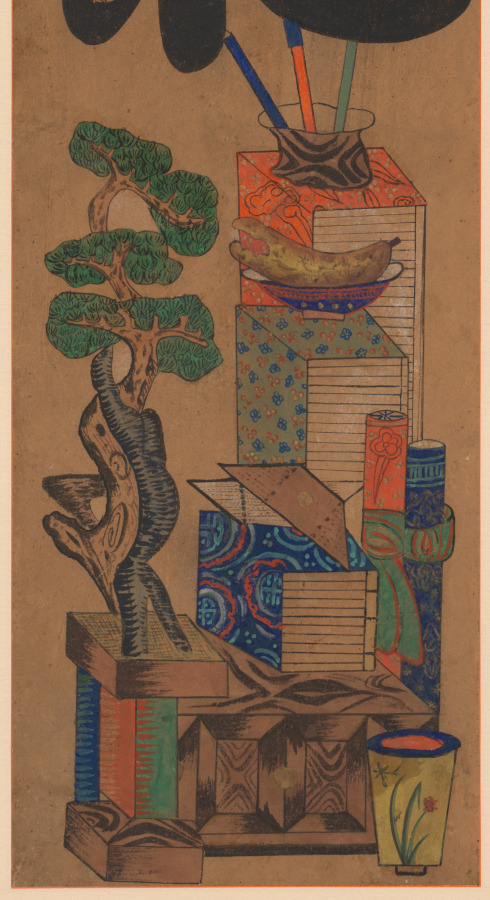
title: Munja-Chaekgeori Screen (Character-Books Screen)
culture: Korea, Joseon dynasty (1392–1910)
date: early 1900s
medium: Eight-panel folding screen, ink on paper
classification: Painting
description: This folding screen is a whimsical harmony of two different subjects: chaekgeori, or books and things; and munja, or characters. The lower section of each panel depicts the imagery of things, including books, decorative arts, and utilitarian objects. The upper portion of each panel bears a classical Chinese character. Read from far right to left, the eight characters refer to the values of Confucian teachings of the Joseon dynasty: filial piety, brotherly love, loyalty, trust, propriety, righteousness, modesty, and humility. While these two pictorial genres are harmoniously conjoined on the same picture plane, two sharply contrasting world views—urban consumerism and traditional Confucian ethics that despise materialism—compete with one another.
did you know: The eight Korean characters each mean filial piety, brotherly love, loyalty, trust, propriety, righteousness or justice, modesty or integrity, and humility or the feeling of shame.